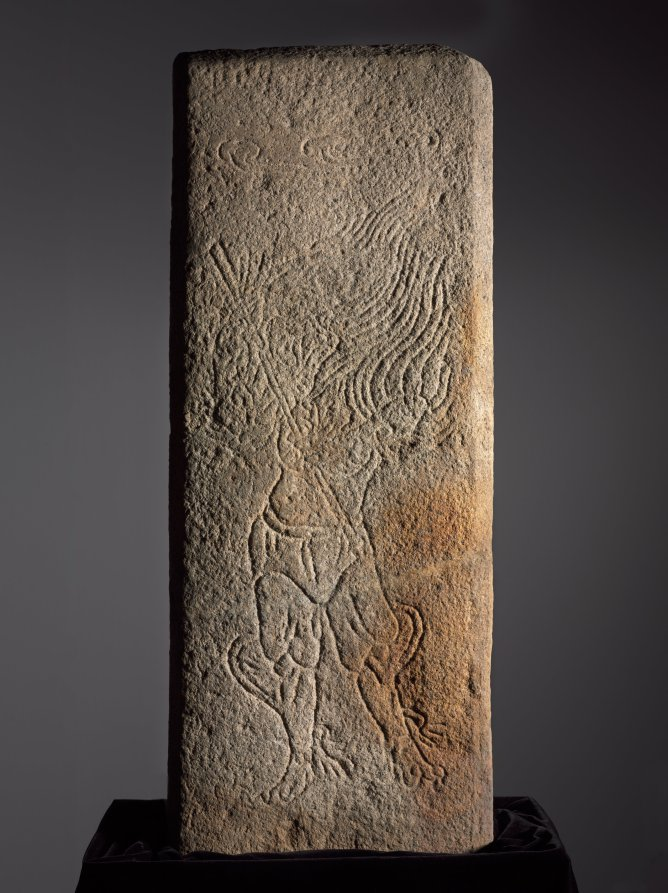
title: Stone Panel for Royal Tomb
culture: Korea, Unified Silla period (676-935)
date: late 700s-early 800s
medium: granite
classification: Sculpture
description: This panel shows a figure with a human body and the features of a rat, which is one of the signs of the Asian zodiac, and is likely one of 12 granite panels from a royal tomb. It is probably from Gyeongju—the capital of the kingdoms of the Silla (57 BCE–668) and Unified Silla (688–935) periods—where large royal tomb mounds can still be found. This panel resembles those showing the animal signs of the Korean zodiac from the tomb of General Kim Yusin (595–673) in Gyeongju, the most famous tomb of the period.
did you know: A rat, one of the signs of the East Asian zodiac, carved in this stone panel symbolizes wealth.